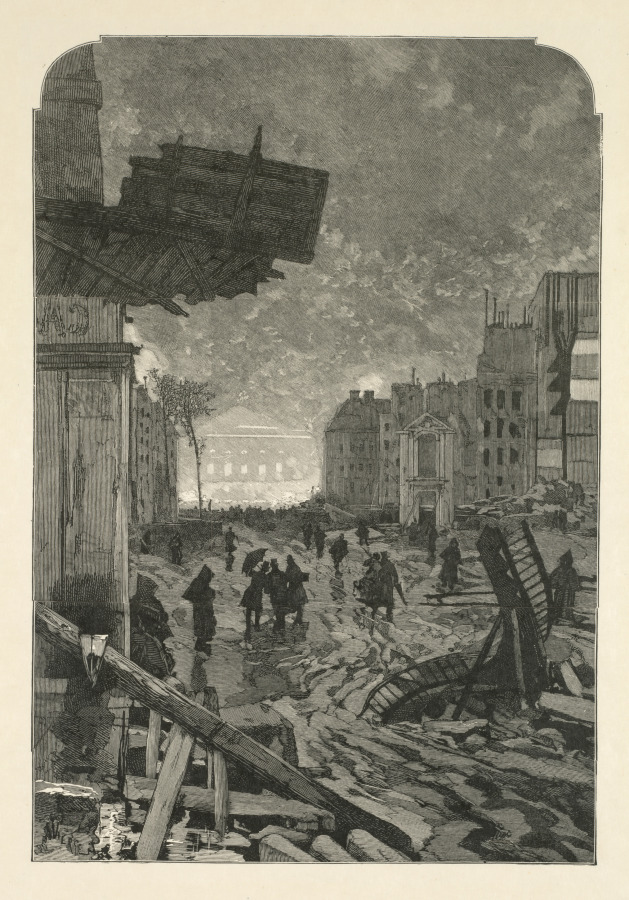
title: Demolition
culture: Spain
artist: Daniel Urrabieta Vierge (Spanish, 1851–1904)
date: 1869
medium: lithograoh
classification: Print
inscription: signed lower right in the block: Vierge